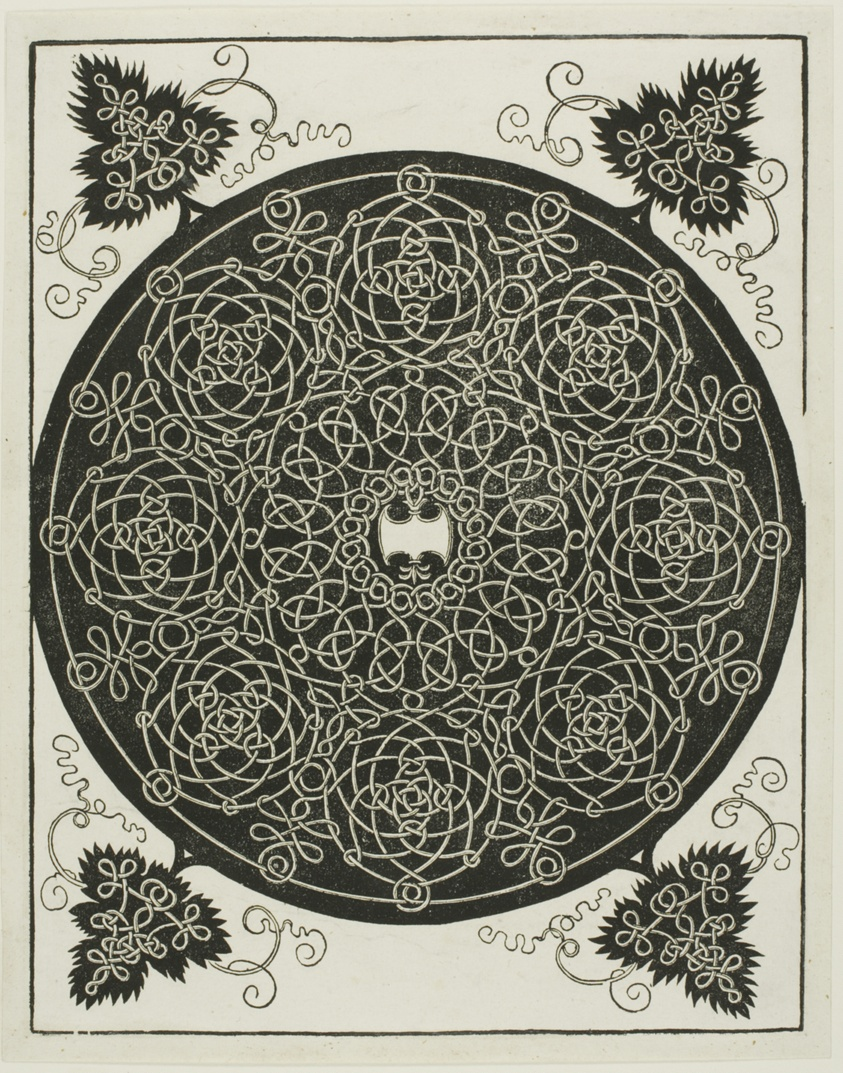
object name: Print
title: The Fifth Knot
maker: Albrecht Dürer (German, 1471-1528)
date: c. 1507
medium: Woodcut in black on ivory laid paper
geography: Germany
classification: woodcut; print; prints and drawing; paper